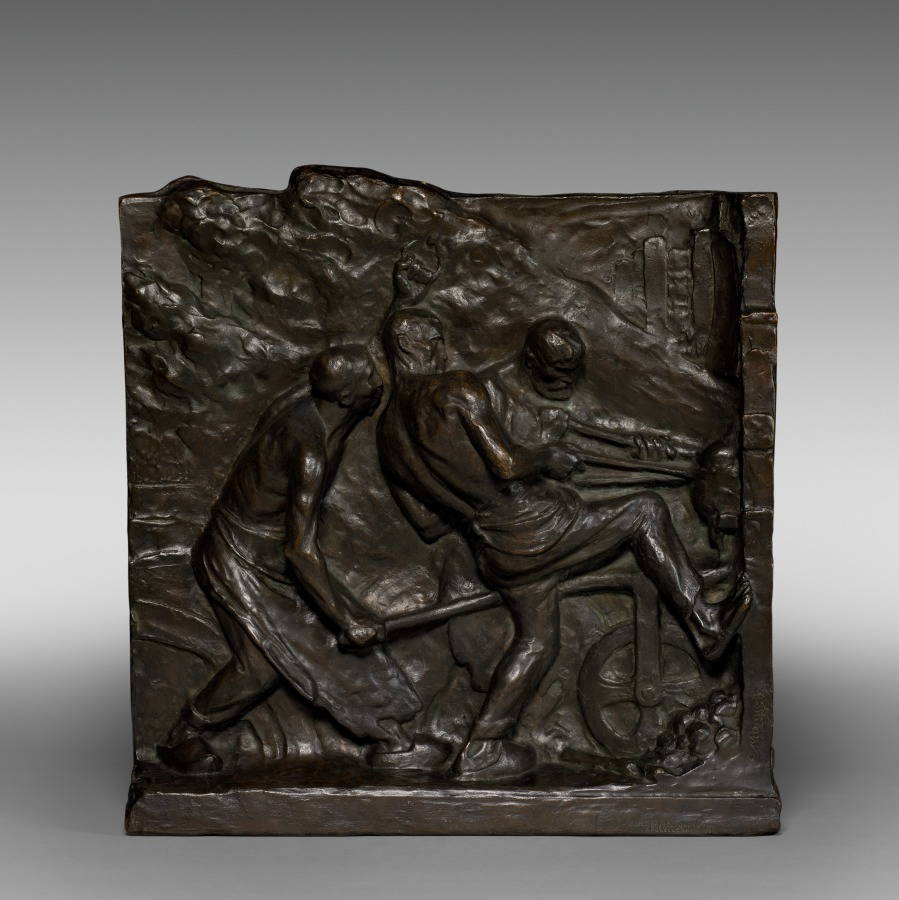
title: The Furnace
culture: Belgium, 19th century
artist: Constantin Meunier (Belgian, 1831–1905)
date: c. 1890 – 1900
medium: bronze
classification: Sculpture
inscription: Signed lower right side: "C. Meunier"; inscribed lower right: "B. Verbeyot, Fondeur, Bruxelles."